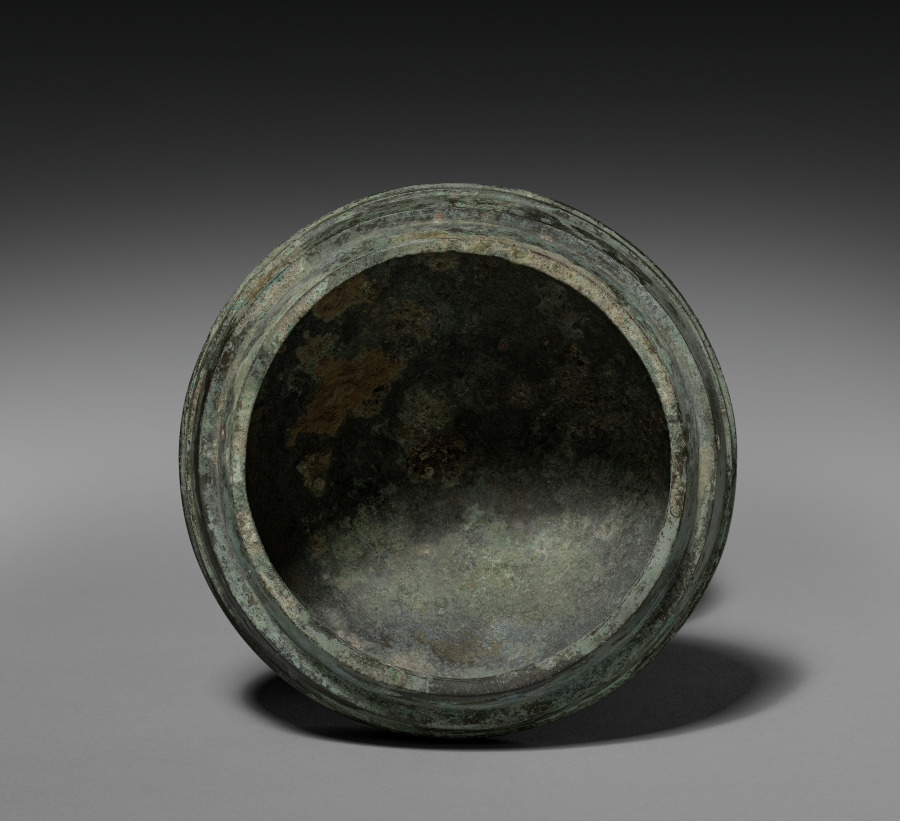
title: Incense Burner (Boshan Lu)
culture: China, Western Han dynasty (206 BCE–8 CE)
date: 200–100 BCE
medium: bronze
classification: Metalwork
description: The conical cover of this incense burner represents a miniature mountain with hunting scenes. The cover was shrouded in mist and emanated intoxicating smoke through its openwork when fragrant woods and herbs were burnt in its stem cup, transporting its beholder into an imaginative realm.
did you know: Deities (appearing as hunters) and fantastic beasts roam freely among mists and clouds on this incense burner.